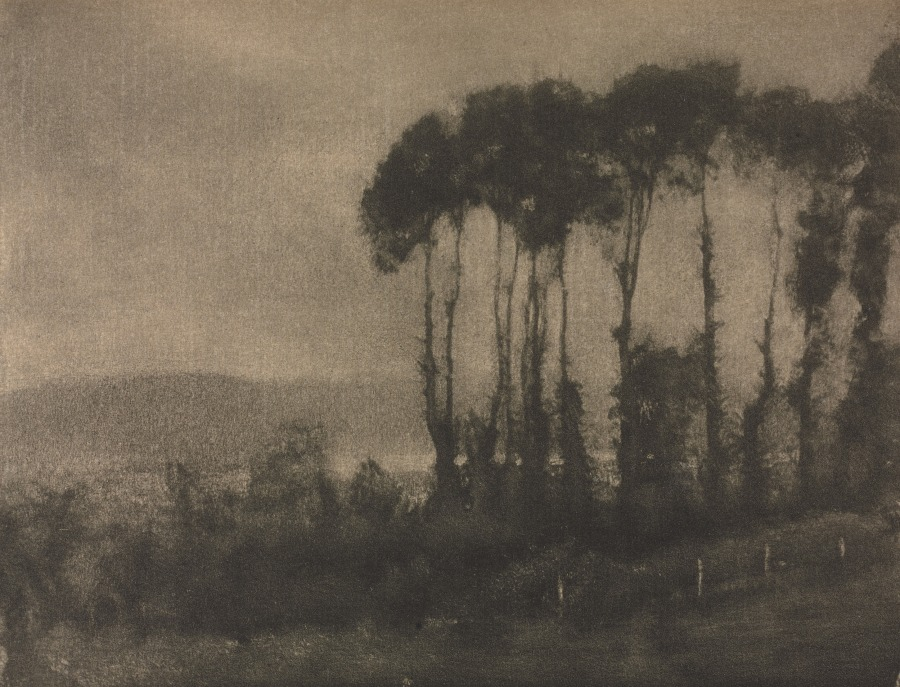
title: Camera Work: Toucques Valley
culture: France, 20th century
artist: Robert Demachy (French, 1859–1936)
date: 1906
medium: photogravure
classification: Bound Volume